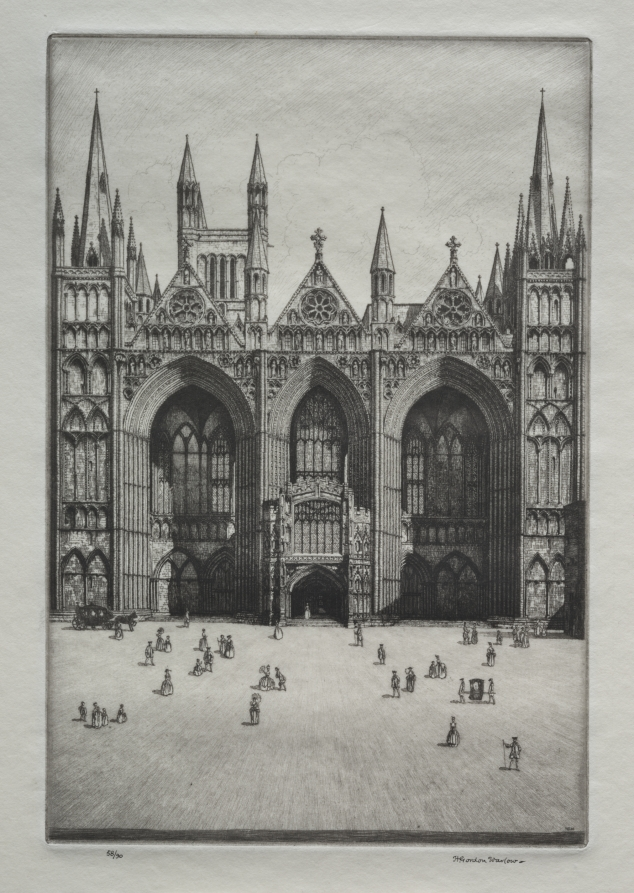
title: Peterborough Cathedral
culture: England, 20th century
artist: Herbert Gordon Warlow (British, 1885–1942)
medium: drypoint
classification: Print